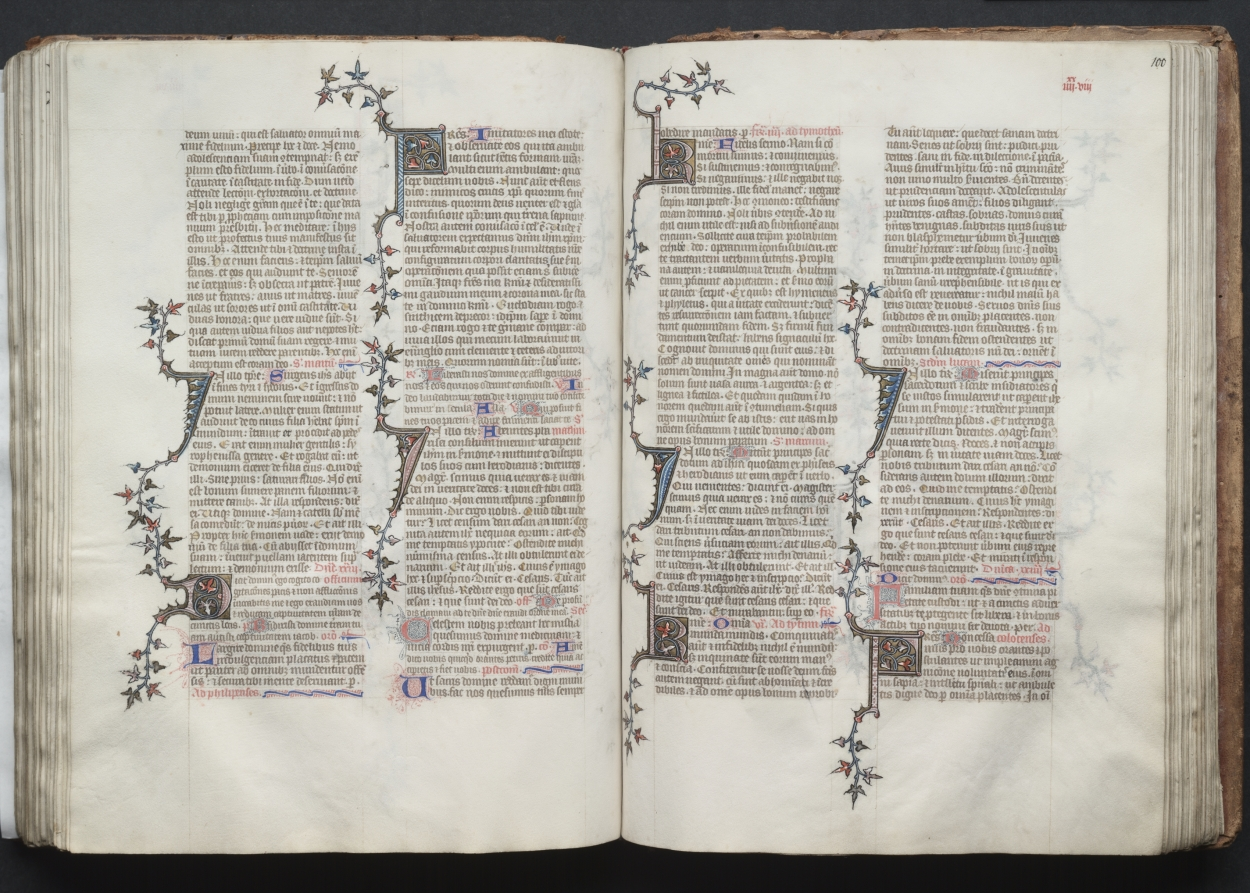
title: The Gotha Missal: Fol. 100r, Text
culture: France, Paris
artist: Master of the Boqueteaux (French)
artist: and Workshop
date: c. 1375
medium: ink, tempera, and gold on vellum; blind-tooled leather binding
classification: Bound Volume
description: The style and quality of this manuscript's decoration is typical of deluxe Parisian books made for aristocratic or royal patrons. Most of the book's decoration appears to be the work of the Master of the Boqueteaux, an artist active at the court of King Charles V (died 1380). His style was apparently shared by a number of book illuminators working in and around Paris. It is very possible that the Gotha Missal belonged to Charles V, but is not provable because the manuscript has no royal portraits and lacks a colophon. Given the book's magnificent decoration, however, it would seem that it was produced for a Valois prince, if not for the king himself. The manuscript receives its name from the German dukes of Gotha, its later owners.